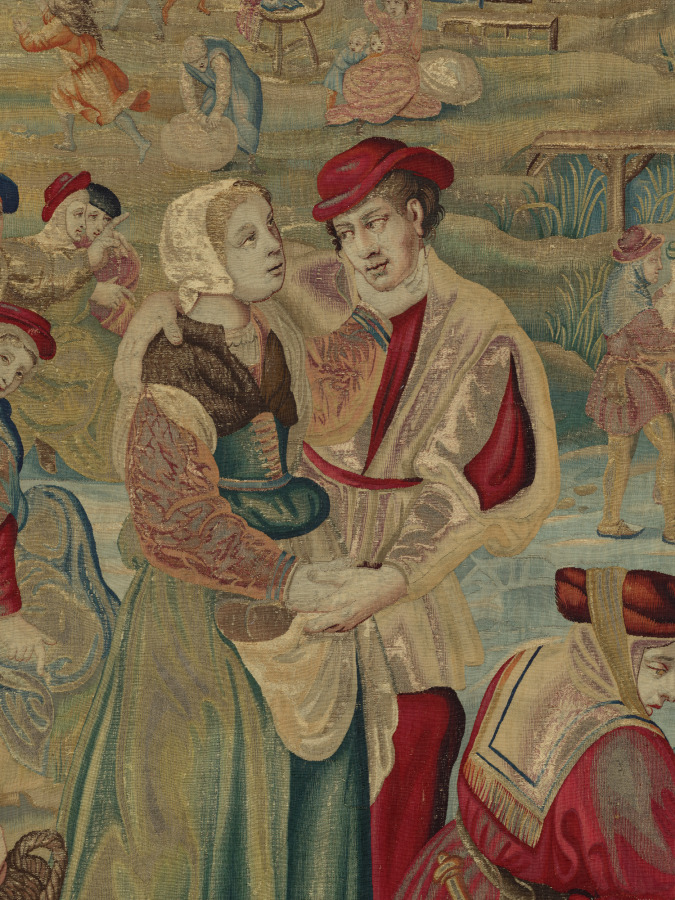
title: Winter: Skating Scene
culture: France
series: Four Seasons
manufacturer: possibly by Gobelins Manufactory (France, Paris, est. 1662)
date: designed c. 1535, woven mid- to late 1600s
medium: Wool, silk, and gold filé: tapestry weave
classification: Tapestry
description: People of all classes and ages enjoyed ice skating, a winter pastime popularized in the Netherlands. Here, some couples are already skating and slipping on the ice, while others tie on their skates or huddle around braziers (portable coal heaters) to keep warm. One affectionate couple in the foreground hold hands as they walk. A castle on the far edge of the frozen lake occupies the background. In the left distance, several small figures holding ladders and long hooks run toward a building that has caught on fire, a frequent occurrence in the winter when wooden houses were heated by fireplaces.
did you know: If you look closely you can see that the top edge of this scene is missing; look at the top of the castle on the right or the forest fire on the left.